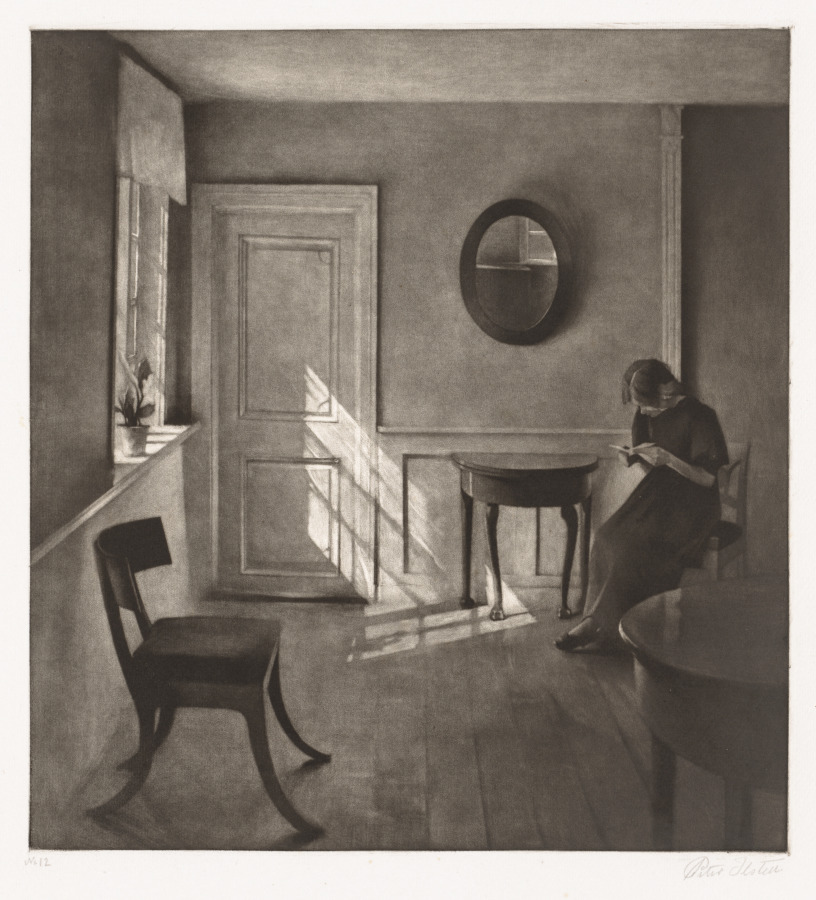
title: Sunshine in an Interior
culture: Denmark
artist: Peter Vilhelm Ilsted (Danish, 1861–1933)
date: 1920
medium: mezzotint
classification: Print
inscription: signed and numbered, in graphite, below platemark: No. 12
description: Peter Vilhelm Ilsted was one of only a few artists of his time to take up mezzotint, the printmaking technique used here. The process involved a tonal reversal—with the artist working from dark to light—that allowed Ilsted to render evocative and moody interiors. Like this print, most of his works were inhabited by young women seen from behind or in profile and involved in introspection or study. The subject of this work appears in darkness at the far side of the image, just beyond a patch of dramatic sunlight that enters the space and perhaps suggests her distance from the outside world.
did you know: Peter Vilhelm Ilsted and his brother-in-law, the painter Vilhelm Hammershøi, pioneered a style of Danish art that was characterized by quiet interior scenes in muted colors.